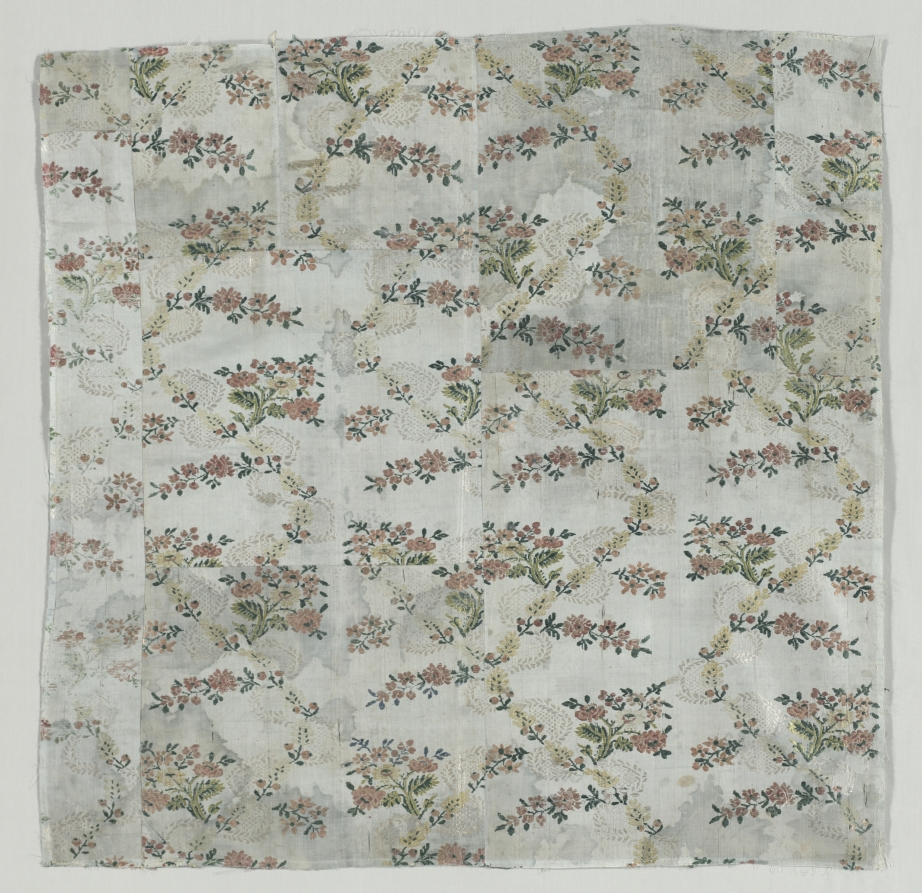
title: Brocaded Silk Cover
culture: Italy, 18th century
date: 1700s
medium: brocade, silk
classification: Textile